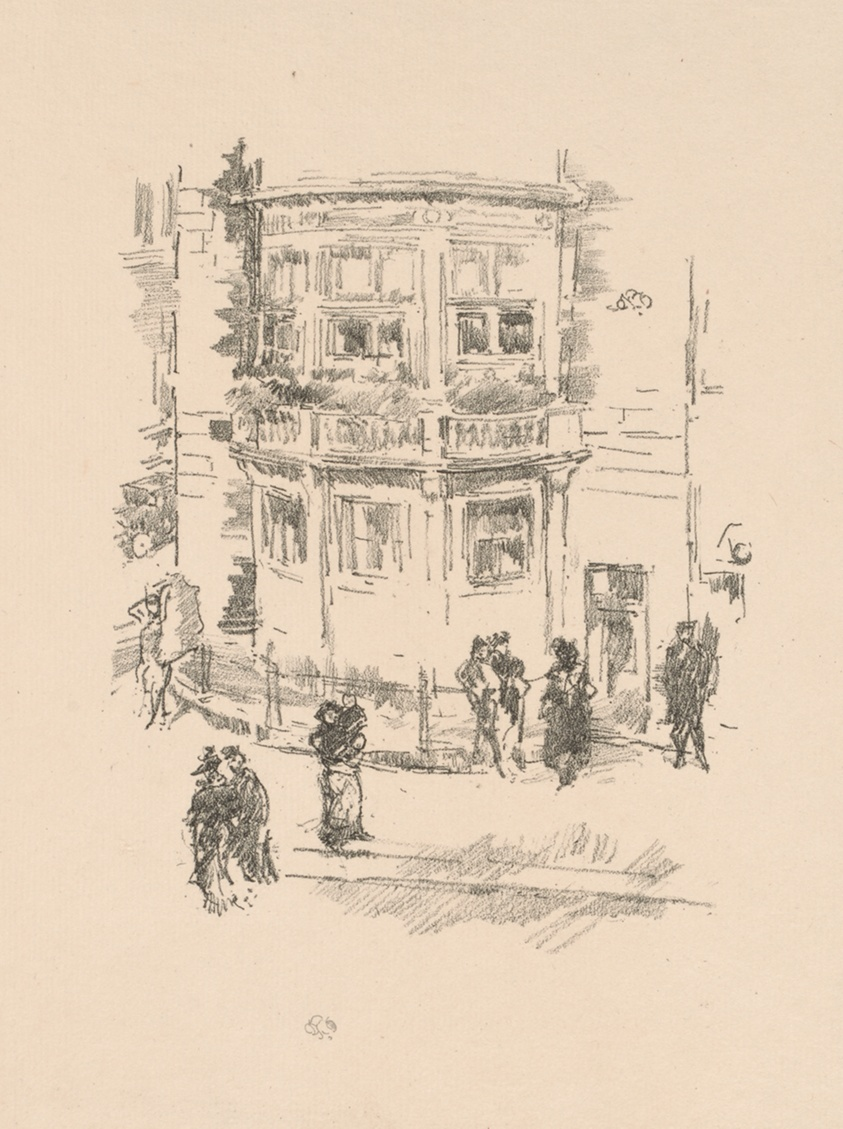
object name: Print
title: The Manager's Window, Gaiety Theatre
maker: James McNeill Whistler (American, 1834-1903)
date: 1896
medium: Transfer lithograph in black on ivory laid paper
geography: United States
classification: transfer lithograph; lithograph; print; prints and drawing; paper